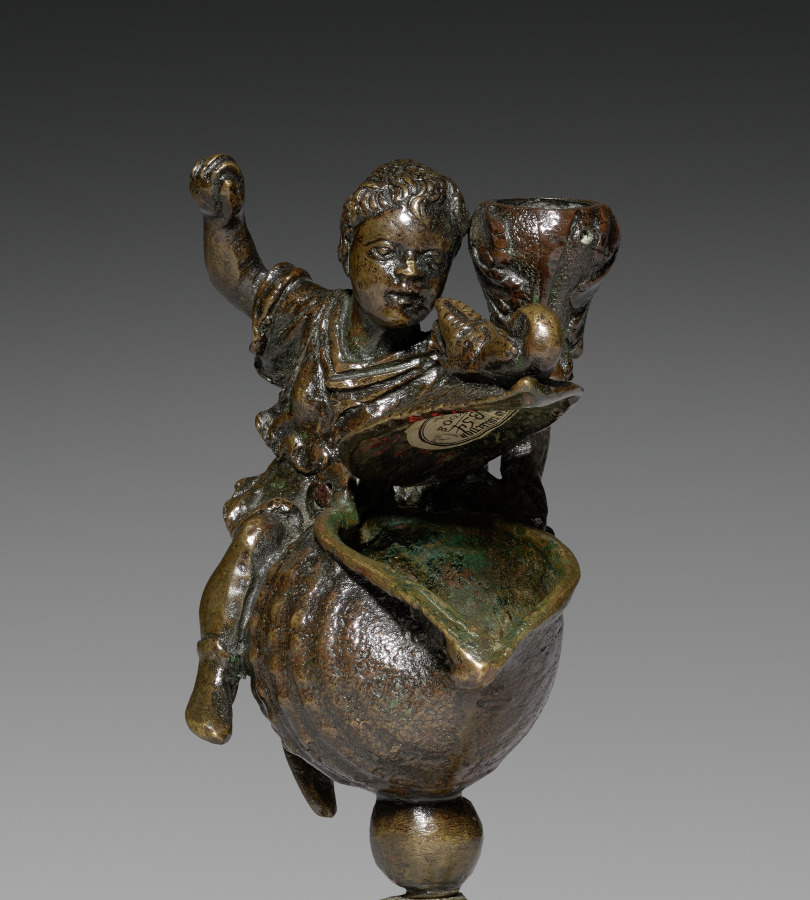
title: Inkwell and Candlestick with the Infant Hercules Killing the Serpents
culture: Italy, Ravenna, 16th century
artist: workshop of Severo da Ravenna (Italian, c.1496–c.1543)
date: c. 1510–20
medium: bronze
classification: Sculpture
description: In the early 1500s, Padua, a center of strong humanist traditions, encouraged the revival of classicism, and artists took their cues from descriptions in the works of classical authors. Classical small-scale bronzes grew in demand, and in response, the city's bourgeoning foundries produced a varied and extensive supply of small statues. Like many early Paduan bronzes, this work's utilitarian function—used to hold ink and to supply light—is complimented by its ornamental value. The base consists of an eagle claw, cast from life, supporting an equally realistic nautilus shell. Though medieval artists had occasionally used seashells to hold paints, the shell inkwell, whose small size makes it rather impractical to use, was a motif particular to Padua. Perched upon the shell is most likely Hercules, the son of Zeus. Perhaps aided by a staff (now missing) he is poised to strike a serpent, which according to myth was sent by Hera, the jealous wife of Zeus, to kill him. The dramatic opposition of hero and monster enhances the connection to the classical past, further meeting the desires of the educated patrons of Padua.